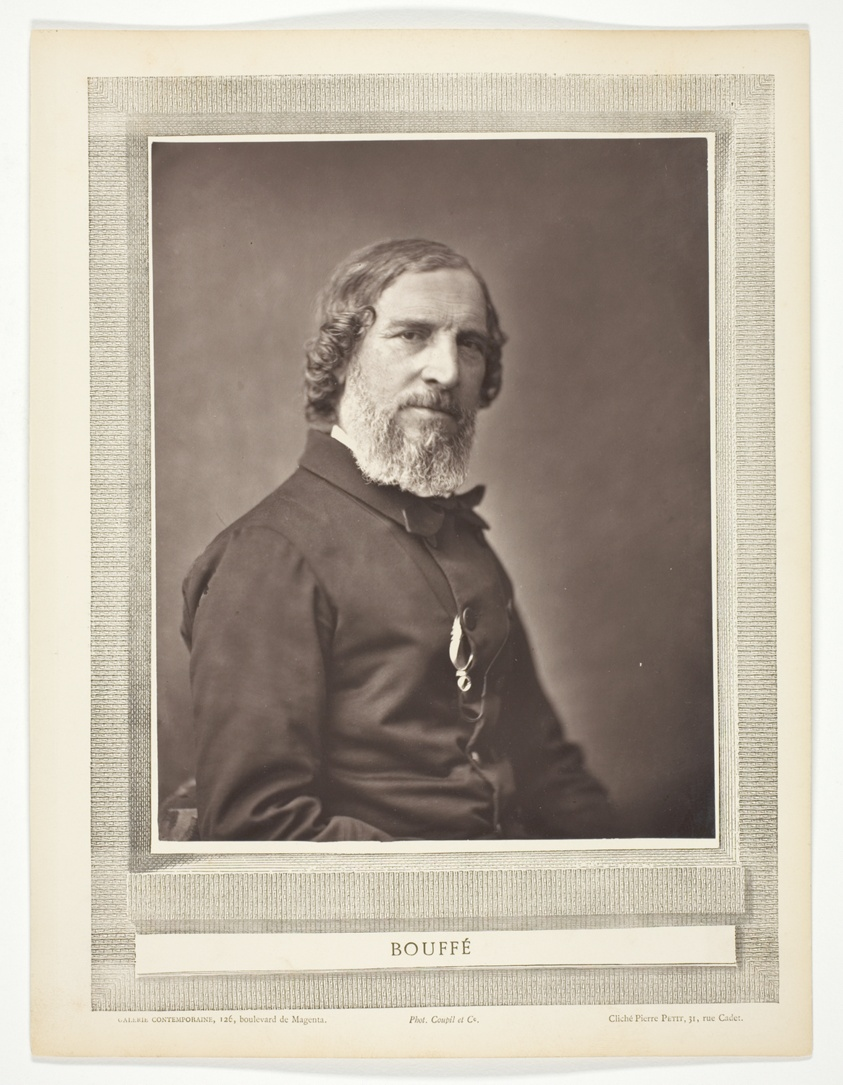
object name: Photograph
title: Bouffé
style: 19th century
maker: Pierre Petit (French, 1832–1909)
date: c. 1873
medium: Woodburytype, from the periodical “Galerie Contemporaine Littéraire, Artistique” (1876), volume 3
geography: France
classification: woodburytype; photomechanical process; photography; photograph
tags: Collected by Hugh Edwards, Contemporaine Littéraire